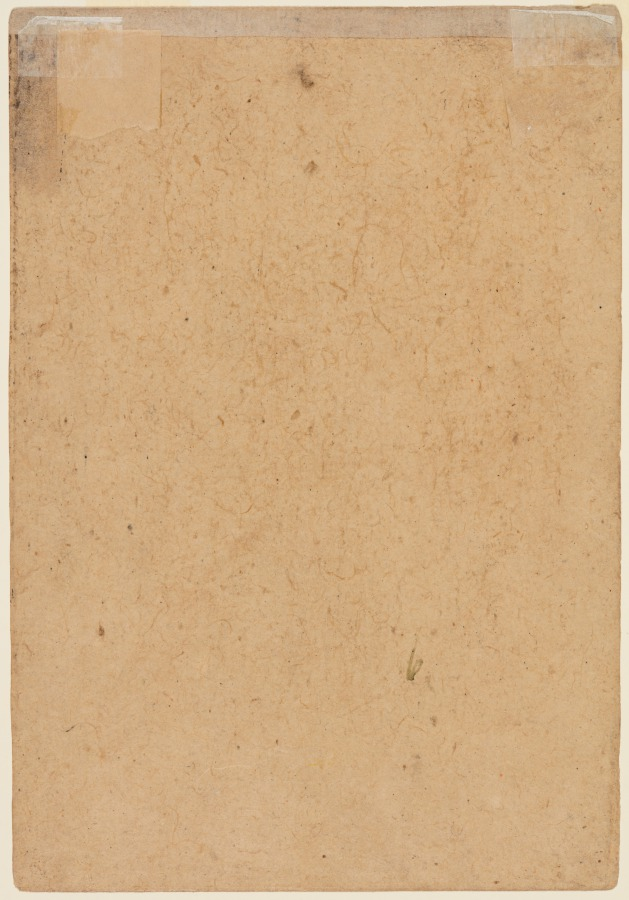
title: An amorous couple, probably Raja Mahendra Pal of Basohli with a favorite queen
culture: Northern India, Pahari kingdoms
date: c. 1810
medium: Gum tempera and gold on paper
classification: Painting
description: On a terrace outside a royal chamber, a couple dressed in noble garments are making love. The man has loosened his jama in passion while his consort’s gold blouse has been thrown on the red carpet. Thin clouds appear to gather above the golden rays of the evening sun in the clear sky.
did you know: Bottles of wine, fruits, and a box of betel leaves are in the foreground.